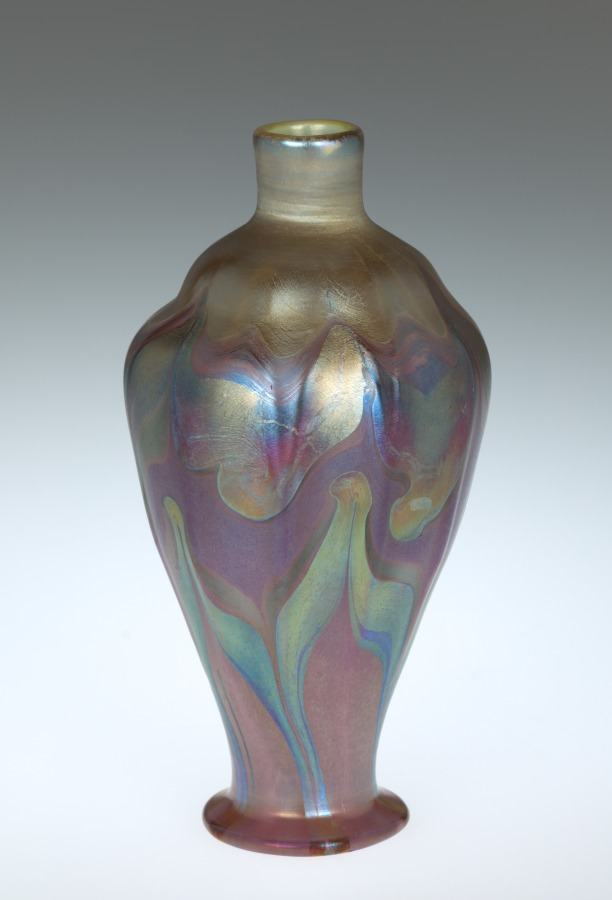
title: Vase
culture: America, New York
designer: Louis Comfort Tiffany (American, 1848–1933)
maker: Tiffany Studios (United States, New York, 1902–32)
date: c. 1905–10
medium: favrile glass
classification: Glass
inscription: inscribed on base: Louis C. Tiffany; L.C.T.; L301.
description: This small vase is made of Louis Comfort Tiffany's signature Favrile glass. Early on when Tiffany began collaborating with glass artists on new types of production, his aesthetic ambitions were realized in the development of Favrile glass, deliberately named to sound French, expensive, and “handmade.” Largely through Tiffany's marketing ability, Favrile glass became America’s greatest contribution to the Art Nouveau style. His works were exhibited at international expositions; galleries in major European cities, where his creations were bought by many museums; and in his store in Manhattan, known as the Tiffany Glass and Decorating Co., later Tiffany Studios. Along with the many shapes and sizes of his decorative vases, Tiffany used Favrile glass in mosaic panels, stained glass windows, and his artistic line of table and floor lamps.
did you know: Introducing various chemicals into the molten glass within the furnace produced multicolored iridescence on the surface when this vase was blown and cooled.